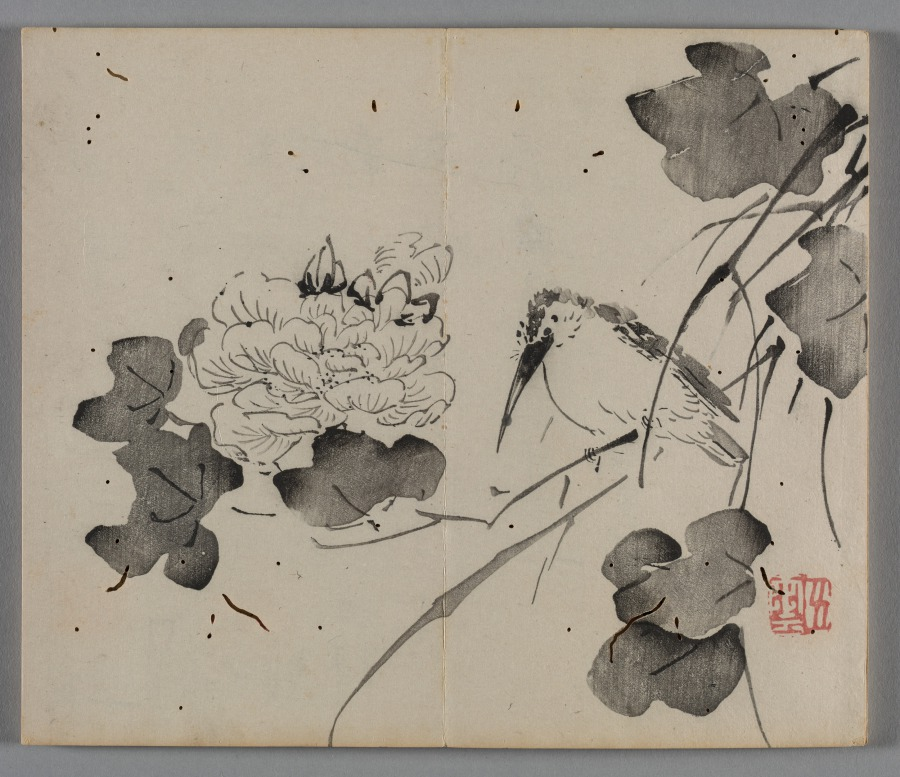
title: Ten Bamboo Studio Painting and Calligraphy Handbook (Shizhuzhai shuhua pu): Birds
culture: China, Qing dynasty (1644-1911)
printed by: Hu Zhengyan (Chinese, c. 1584–1674)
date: 1633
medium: Woodblock-printed book; ink and colors on paper; first edition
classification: Print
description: Color printing reached a level of perfection in the early 1600s, as seen in this Ten Bamboo Studio Collection of Calligraphy and Painting and the Mustard Seed Garden Manual of Painting (printed 1679 and 1701). The painterly quality, precision in registering (aligning) the woodblocks, and harmonious colors made them the most successful color print editions in Chinese history. Both editions were printed and compiled in Nanjing, spread nationwide, and had a great impact on the arts in Japan and Korea.